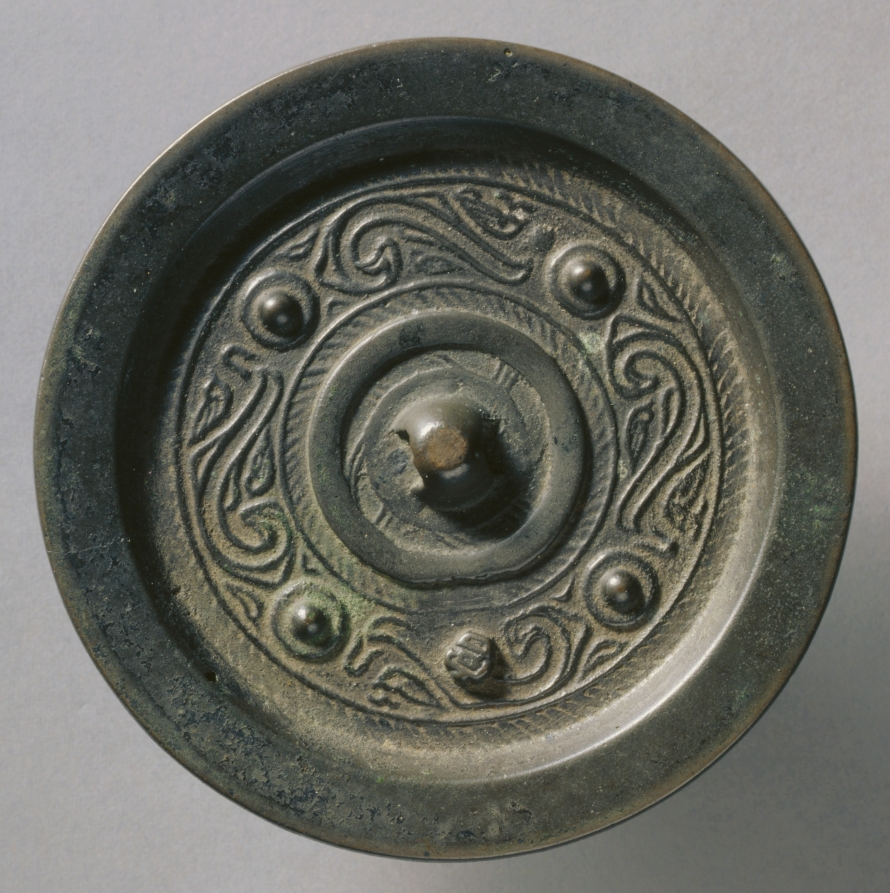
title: Mirror with Four Nipples, Four Quasi-Dragons, and Birds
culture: China, Ming dynasty (1368–1644)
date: mid-1300s–mid-1600s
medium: bronze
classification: Metalwork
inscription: (Gong)